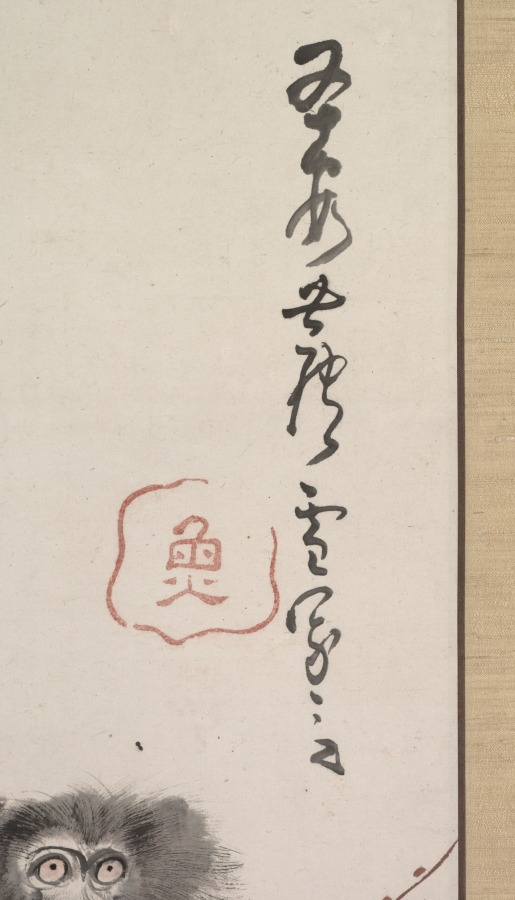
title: Monkeys by a Stream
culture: Japan, Edo period (1615–1868)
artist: Nagasawa Rosetsu (Japanese, 1754–1799)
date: c. 1796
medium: hanging scroll; ink and color on paper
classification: Painting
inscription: Inscription: 平安蘆雪寫意; Transliteration: Heian Rosetsu shai; Sealed: 魚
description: The two monkeys in this painting are Japanese macaques. The one in front dangles its left leg over a sharply angled rock, surveying the land beyond a fast-moving mountain stream. A smaller monkey sits behind it, looking directly ahead as if it realizes it is being watched. The artist used just a few highly contrasting warm and cool colors, sweeping brushstrokes over ink washes, and loose lines to create a scene that powerfully evokes the mentally engaged state of the two animals.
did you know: Monkeys, which are found throughout the mountainous and wooded areas of Japan, became a favorite subject of many later Japanese artists.